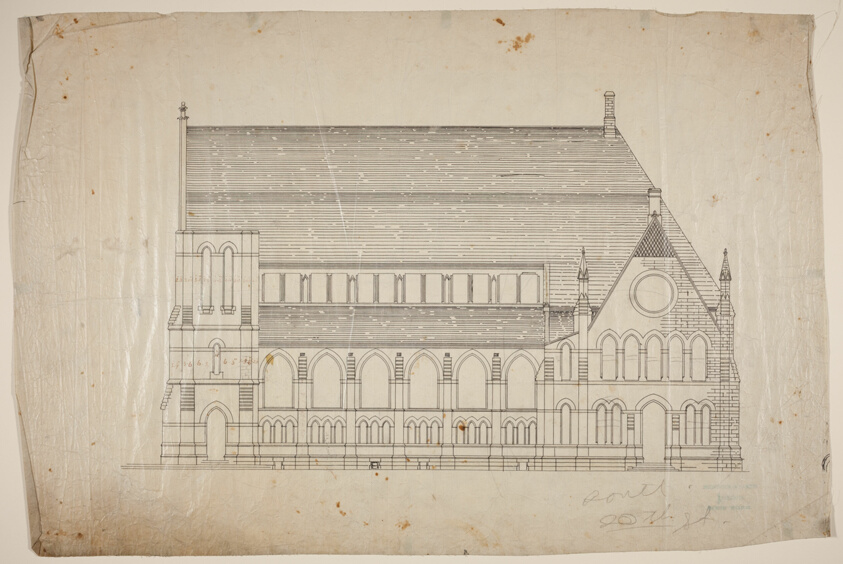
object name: Architectural Drawing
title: Second Presbyterian Church, Chicago, Illinois, North Elevation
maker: Renwick and Sands; American, 1862-1877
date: 1874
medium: Ink on linen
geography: Michigan Avenue, 1936 South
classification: working drawing; architectural drawing